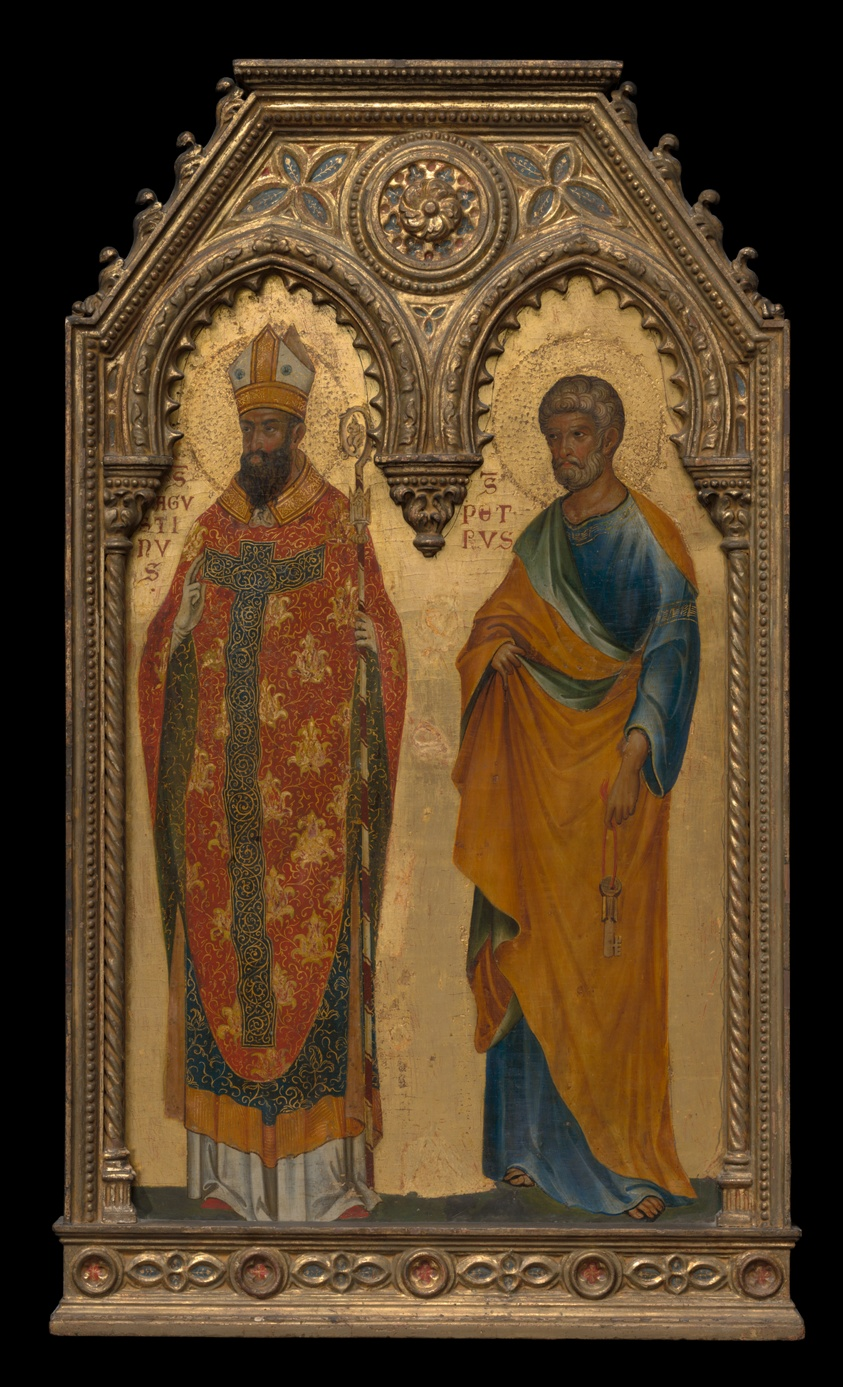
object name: Painting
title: Saints Augustine and Peter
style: 14th century, medieval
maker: Paolo Veneziano (Italian, active 1333–1358/62); Workshop of Paolo Veneziano (Italian, active 1333–1358/62)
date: c. 1350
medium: Tempera on panel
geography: Venice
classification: tempera; Italian; paint; painting; european painting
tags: saints, staffs, religious figures, religious attire, religious, religion, red (color), orange (color), men, keys, hat, gold (color), Christianity, Christian subjects, blue (color), blue, Century of Progress, world's fairs, Chicago World's Fairs